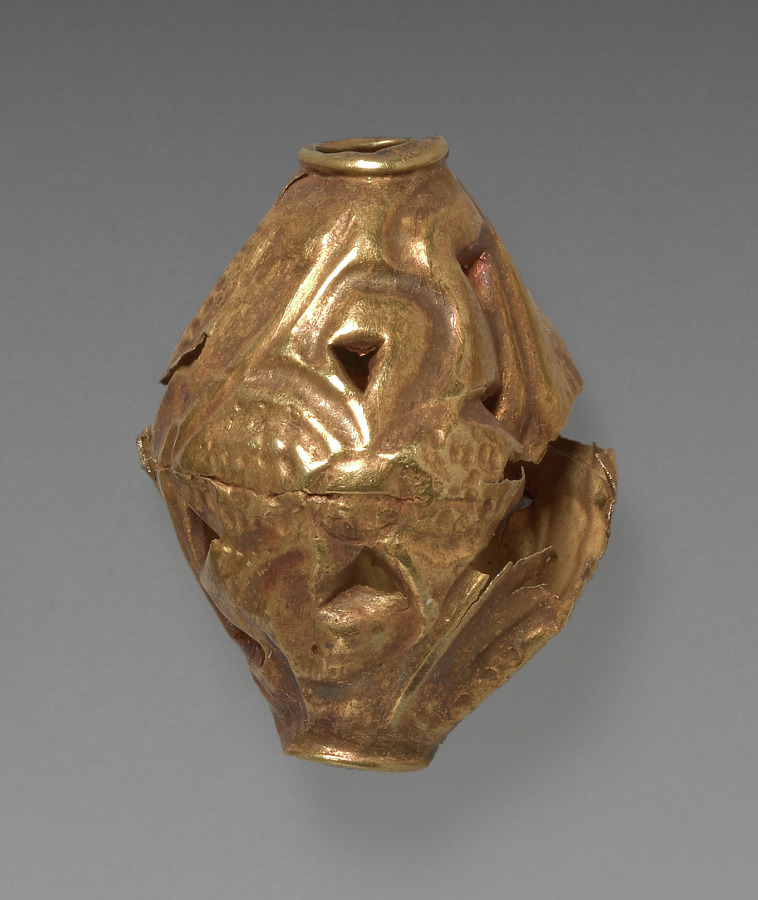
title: Bead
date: after 1519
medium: gold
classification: Jewelry